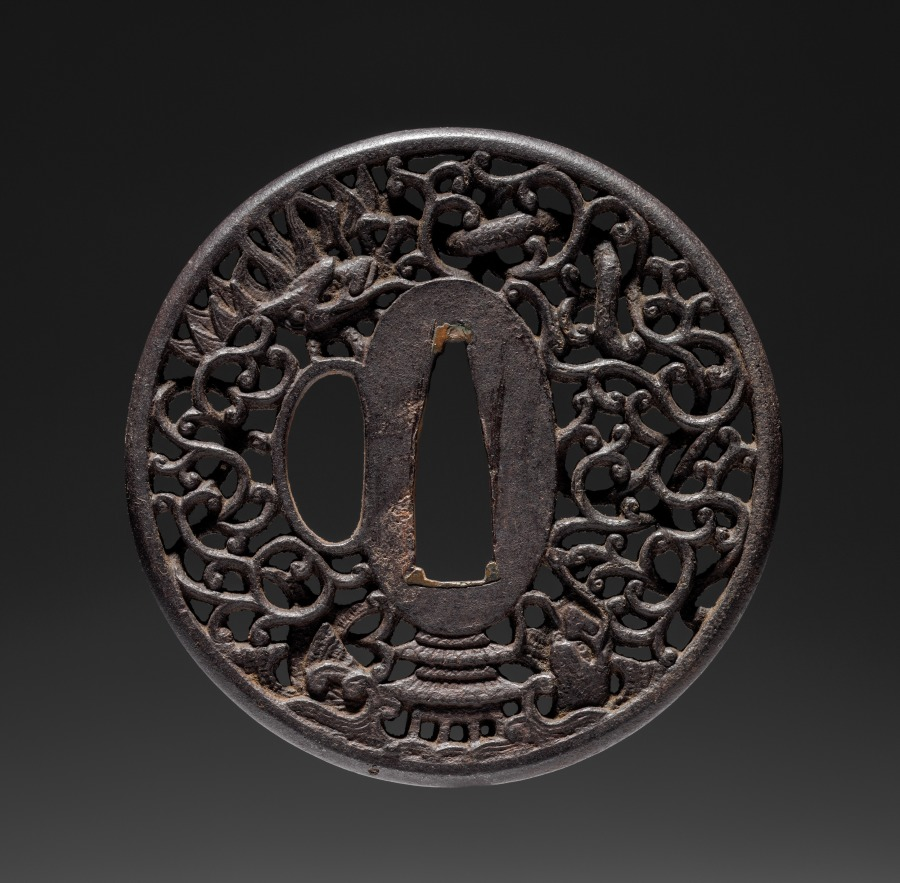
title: Sword Guard (Tsuba) with Dragon and Palace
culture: Japan, possibly Edo period (1615-1868)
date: c. 1615–1868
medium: iron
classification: Arms and Armor